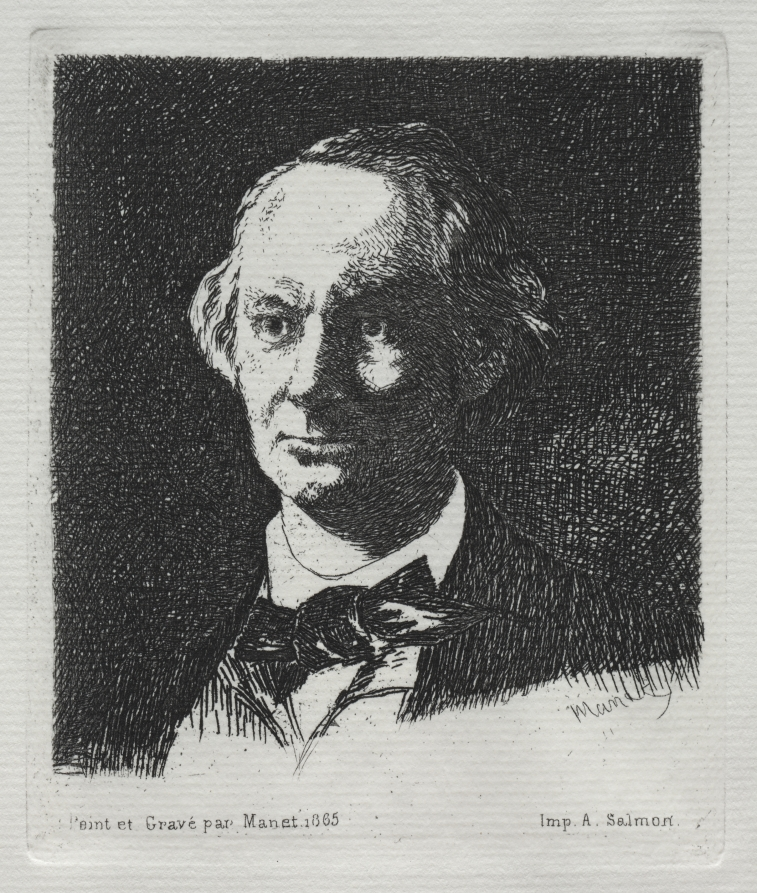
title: Charles Baudelaire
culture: France, 19th century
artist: Édouard Manet (French, 1832–1883)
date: 1869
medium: etching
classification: Print